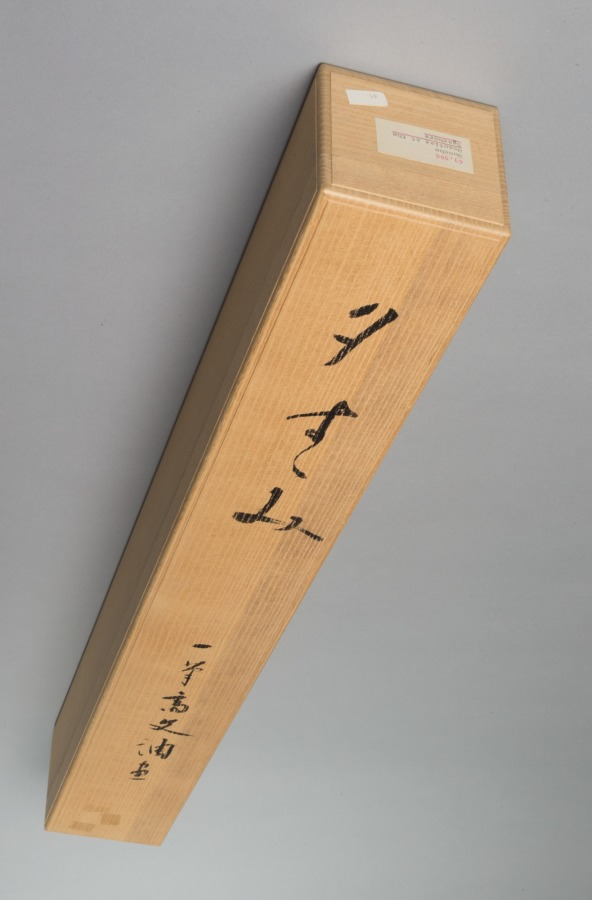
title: Beauties at the Seashore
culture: Japan, Edo period (1615–1868)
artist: Ippitsusai Bunchō (Japanese, active c. 1765–92)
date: c. 1765–92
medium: hanging scroll; ink and color on paper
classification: Painting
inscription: Undeciphered, severely faded seal in lower right corner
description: Bunchō portrays the popular subject of cooling off by the water on a late spring or early summer evening, as suggested by the willow. The seated lady enjoys her pipe-smoking—a popular pastime for Edo women. In the background, some fireworks are set off from a small boat.